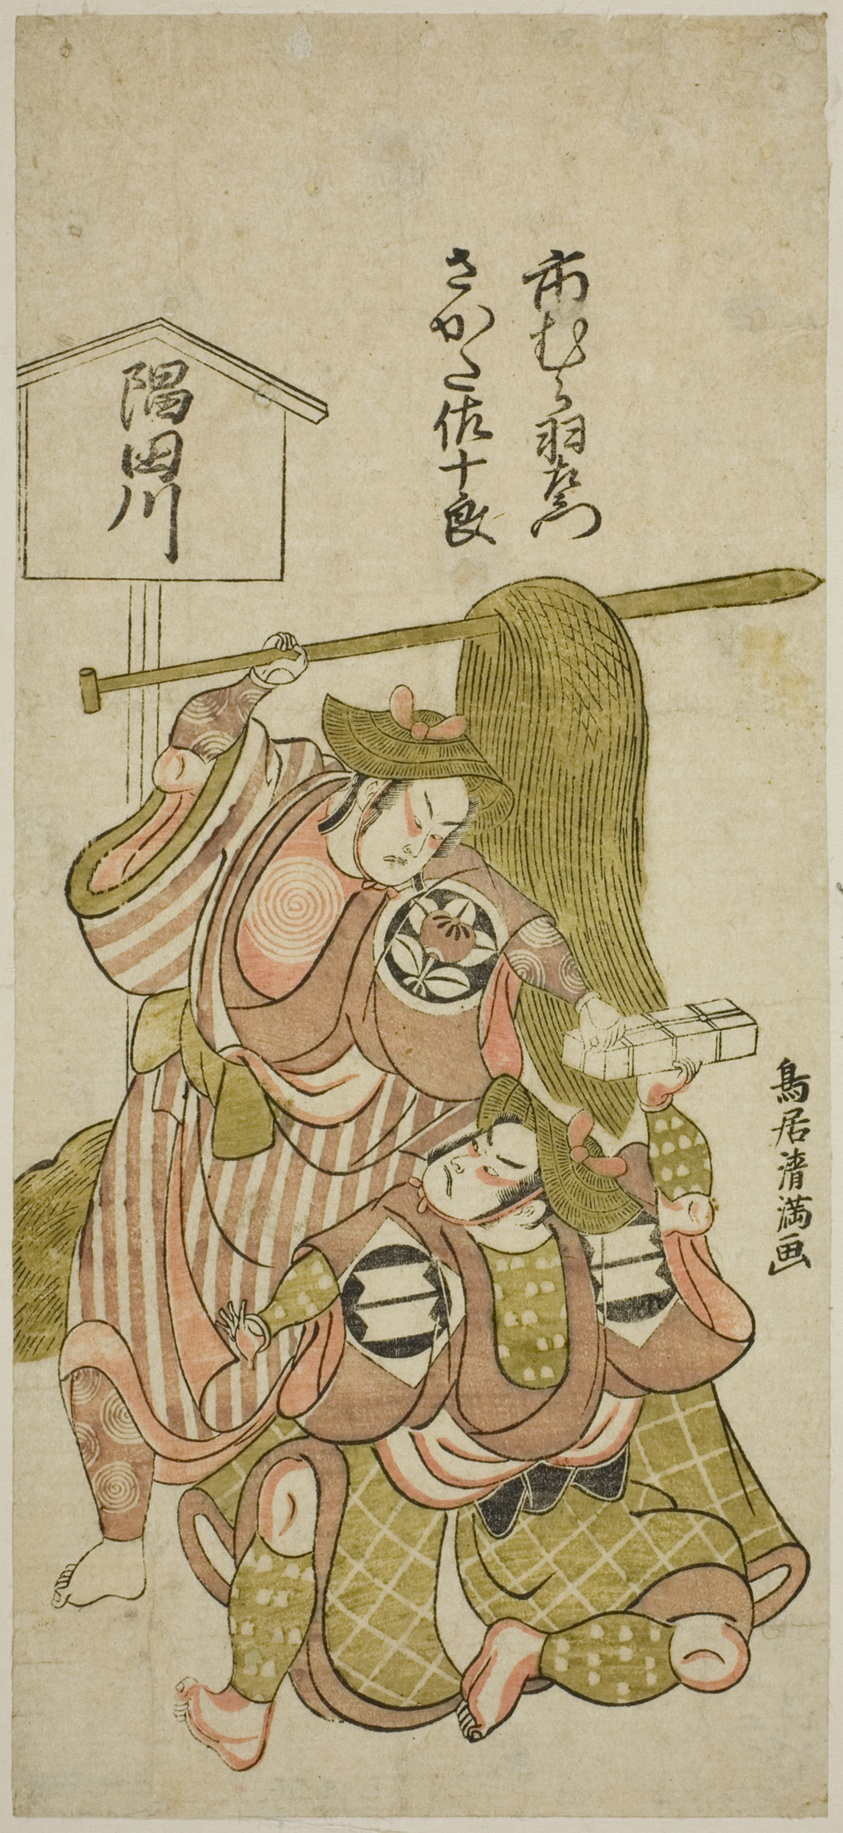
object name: Print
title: The Actors Ichimura Uzaemon IX as the footman Gunsuke and Sakata Sajuro I as Yamaga no Sashiro in the play "Iro Jogo Mitsugumi Soga," performed at the Ichimura Theater in the first month, 1765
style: Japanese (culture or style)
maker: Torii Kiyomitsu I (Japanese, 1735-1785)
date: 1765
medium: Color woodblock print; hosoban, benizuri-e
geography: Japan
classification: print; asian art